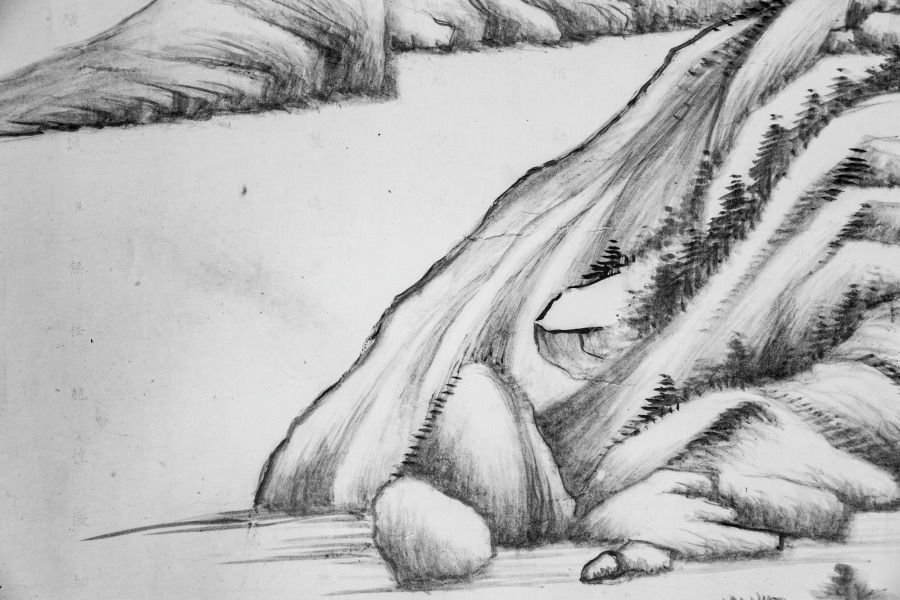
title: River and Mountains on a Clear Autumn Day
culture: China, Ming dynasty (1368–1644)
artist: Dong Qichang (Chinese, 1555–1636)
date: c. 1624–27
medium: Handscroll; ink on Korean paper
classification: Painting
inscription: 黃子久江山秋霽似此，當恨古人不見我也。思翁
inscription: 董文敏每遇高麗鏡面箋，書畫尤為入神。此卷改表紙用之，字跡隱然，兼有朝鮮之印。至於筆法圓秀，真接倪黃。豈文沈所可同日而語也。 康熙庚午中秋後一日，天氣澄爽，重裝初畢，跋於瓶廬。抱瓮翁高士奇。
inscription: Second inscription by Gao Shiqi 高士奇 (1645–1704): On the twenty-third day of the ninth month, the jiaxu year of the Kangxi era [1694], I packed my bags to head north. When my boat passed Wuchang [Suzhou], Mr. Mantang [Song Luo] brought wine to bid me farewell so that we could share our thoughts on our separation in the last few years. I showed him the paintings and calligraphy which I collected and asked his opinions. Since Mr. Mantang does not own any handscrolls by Wenmin [Dong Qichang], I leave this one for him in commemoration of our parting; thus the painting will have a worthy owner and our meeting will become a beautiful story in the future. It is the fourth day after the beginning of winter, with the sky clear and sober. Trees under frost have turned red and yellow, seemingly echoing the brush and ink in the painting. I also ask Mr. Mantang to inscribe a poem to commemorate our meeting so that it will survive forever.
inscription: 1 colophon and 4 seals of Song Luo 宋犖 (1634–1713): Who is the foremost art connoisseur of our dynasty?/ Tangcun [Liang Qingbiao, 1620–1691] is dead, so the title passes to Jiangcun [Gao Shiqi]./ Leaving office, you retired for five years in the Lake region./ Fondling handscrolls and hanging scrolls from morning to evening./ You sent me your collection catalogue Xiao Xia Lu last year;/ It is indeed the true equal of [Zhou Mi's] Yun Yan Guo Yan./ This year you returned to the capital by imperial order;/ Your boat with calligraphy and paintings anchored at the river bank in Suzhou./ When we met each other you did not waste any time for conversation by poured out immediately/ From your "coral net" extraordinary treasures./ You produced incomparable scrolls, with gold-inscribed labels and jade rollers,/ Pouring out from bags and trunks, they were spread in disarray./ Without a word, I rolled and unrolled until my fingers were numbed,/ We sat straight, facing each other quietly, and never felt tired./ For three days we forgot about sleeping and food./ And at times we shouted our joy out loud, forgetting who is host or guest./ Your Dwelling in the Fuchun Mountains and the Yuansheng manuscript/ These peerless works I myself examined with delight./ As an added pleasure to the farewell dinner under the Maple Bridge,/ You allowed me to hold again this handscroll by Dong Qichang--/ The Misty River and Piled Peaks [by Zhao Mengfu] and this Clear Autumn Day are two extraordinary masterpieces./ In showing such life and spirit with "qi yun." the artists were truly "men of heaven."/ The Clear Autumn Day is not even three feet long,/ Painted on tributary Korean paper, it shines like silver./ Every building up and every turn of the mountains imitates nature,/ Every tree and every rock is removed from the commonplace./ From the beginning, the theory of poetry is the theory of painting,/ Like the lotus and the morning sunshine, they complement and refresh each other./ The artist's inscription regrets that "the Old Masters cannot see my scroll."/ Huang Gongwang would have agreed in his grave./ The vermilion of the seals glitter and dazzles the eyes,/ These added accessories are as valuable as jade./ You are very kind to give it to me,/ The feelings expressed in your inscription are so sincere./ Wanting to refuse, but unable, I accept it to respect your wish,/ And taking off my gown and cap I wrapped it with care./ You asked me to write a long poem in commemoration of this beautiful occasion,/ I am too ashamed that my effort in response is so poor and inadequate./ Returning home, I unrolled it under candlelight, trying to write the colophon,/ The light of the waning moon shines at the foot of the mossy wall./ Earnestly humming and brows knit in deep thought, I try to compose;/ The verses are not outstanding, but the facts are real./ With this poem recorded at the end of the scroll, I mail it to you for approval,/ This poem and this painting shall outlast a thousand springs. (Translation by LYSL/HK/WKH)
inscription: 1 colophon and 2 seals of Shao Changheng 邵長蘅 (1637–1704); 2 inscriptions and 14 seals of the Qianlong 乾隆 emperor (r. 1736–95); 1 seal of the Jiaqing 嘉慶 emperor (r. 1796–1820); 3 seals of the Xuantong 宣統 emperor (r. 1908–11); 1 seal unidentified.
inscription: [印] 朝鮮國王之印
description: Dong Qichang had a tremendous impact on the artistic practices and historiography of later generations; his works and writings shaped literati aesthetics. Here, Dong places an abstract landscape composition diagonally across the picture plane, configured to recall earlier masters and simultaneously express his own personal style. Dong’s inscription claims, Huang Gongwang’s Autumn Day, looks like this. I truly regret the master has not seen my work. In fact, Dong Qichang may have had Dong Yuan’s Xiao and Xiang Rivers in mind, a work he owned and considered a key work in Chinese art history.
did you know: The painting has an imprint of a Korean seal that reads "Seal of the king of Joseon."